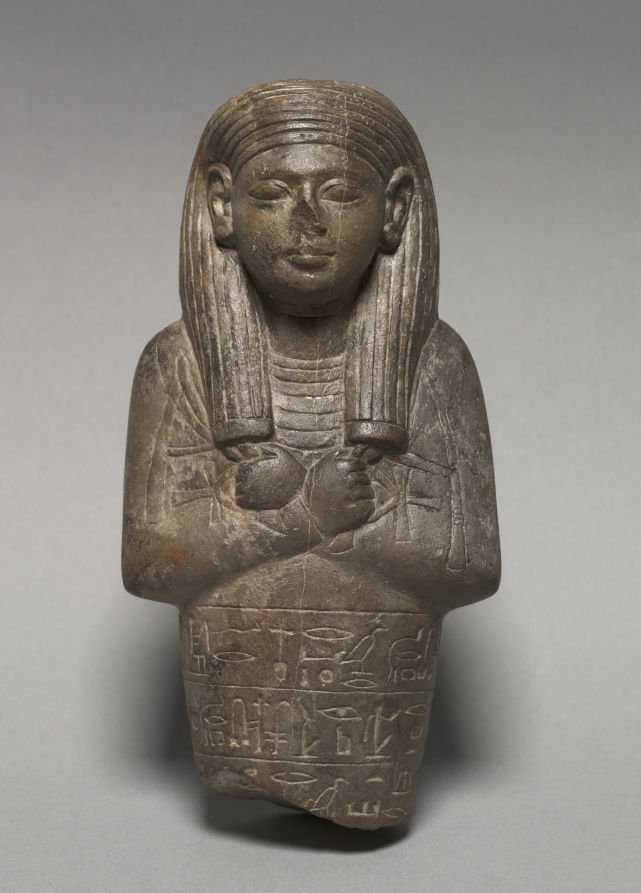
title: Shawabty of Ranefer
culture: Egypt, New Kingdom (1540–1069 BCE)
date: 1336–1295 BCE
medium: limestone, originally painted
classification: Funerary Equipment